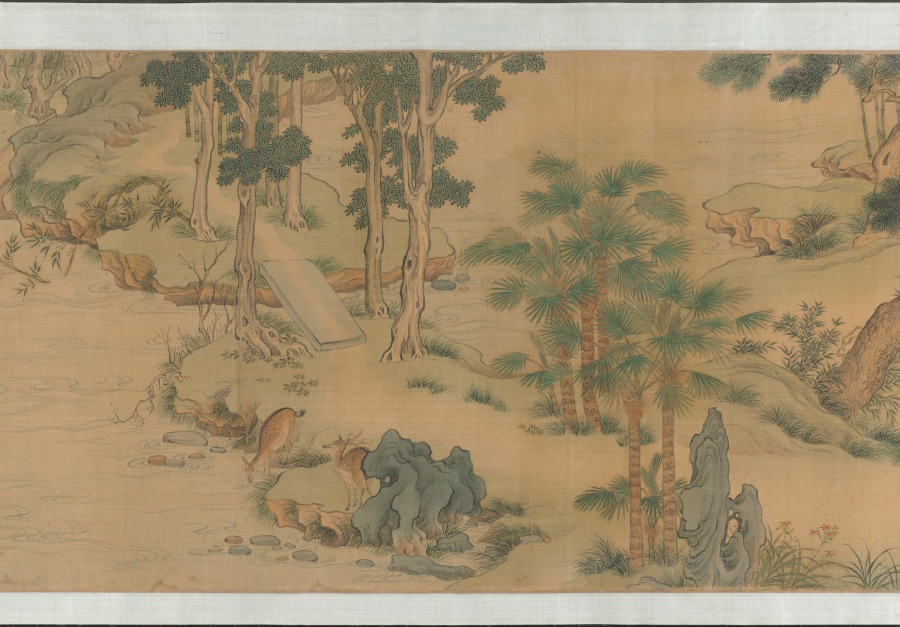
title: Garden for Solitary Enjoyment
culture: China, Ming dynasty (1368–1644)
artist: Qiu Ying (Chinese, 1494–1552)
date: 1515–52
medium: Handscroll; ink and light color on silk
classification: Painting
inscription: Accompanying text of an essay together with seven poems of Sima Guang (1019–1086) and one poem of Su Shi (1037–1101) written by Wen Zhengming (1470–1559) in 1558.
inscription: 2 colophons and 82 seals: 4 seals of Wen Zhengming 文徵明 (1470–1559); 59 seals of Xiang Yuanbian 項元汴 (1525–1590); 1 colophon, dated 1644, and 7 seals of Xiang Yukui 項禹揆 (c. late 1500s–1659); 1 colophon, dated 1880, and 2 seals of Weng Tonghe 翁同龢 (1830–1904); 2 seals of Ch'eng Chen-i (19th c.); 1 seal of Han Ch'ung (19th c.); 4 seals of Wan-go H. C. Weng 翁萬戈 (1918–2020); 3 seals unidentified.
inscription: Colophon by Xiang Yukui 項禹揆 (c. late 1500s–1659): The painting of The Garden for Self-enjoyment on the right by Shih-chou, Mr. Qiu [Qiu Ying] is in the style of Li Lung-mien. Its mood is peaceful, as if meeting the ancient gentlemen face to face among the brushes and silk; it lifts one above the sordid bustle of life. Formerly, my late father handed me this scroll which had only the painting without the written essay. I considered asking a good calligrapher to write the essay to add to it but was afraid that the quality of the writing would not match the painting. Several years later, I saw at a friend's house this essay and poems (of Ssu-ma Kuang] written by Hengshan [Wen Zhengming], once owned by my grandfather; so I spared no expense to obtain it. I rejoiced at this and said: "The divine swords are finally united. How things are pre-destined!" Now my friend Chang Kung-chao's technique for mounting [painting and calligraphy] is excellent. Therefore by daring to take them out and join them together, I can preserve this beautiful story of singular reunion. Xiang Yukui recorded at Hai-yeh-t'ang [hall] two days before New Year's Eve in the jiasheng year of the Chongzhen era [1644]. trans. LYSL/HK/WKH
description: Garden of Solitary Enjoyment refers to a site built in 1073 by the statesman Sima Guang (1019–1086) after he had retired to Luoyang, Henan province. Every spring, visitors would flock to his garden. Each of its seven structures references a historic figure. Sima wrote: I channel streams [like Du Mu], to water flowers [like Bai Juyi], or trim bamboo [like Wang Huizhi]. . . . I know of no joy between heaven and earth that could take its place. Qiu Ying’s painting, created after an 11th-century version of the same theme, must have appealed to garden owners of the Ming dynasty, since it became the template for numerous Suzhou workshop copies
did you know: Sima Guang completed his monumental survey of Chinese history, Zizhi tongjian, in the garden depicted in this painting.